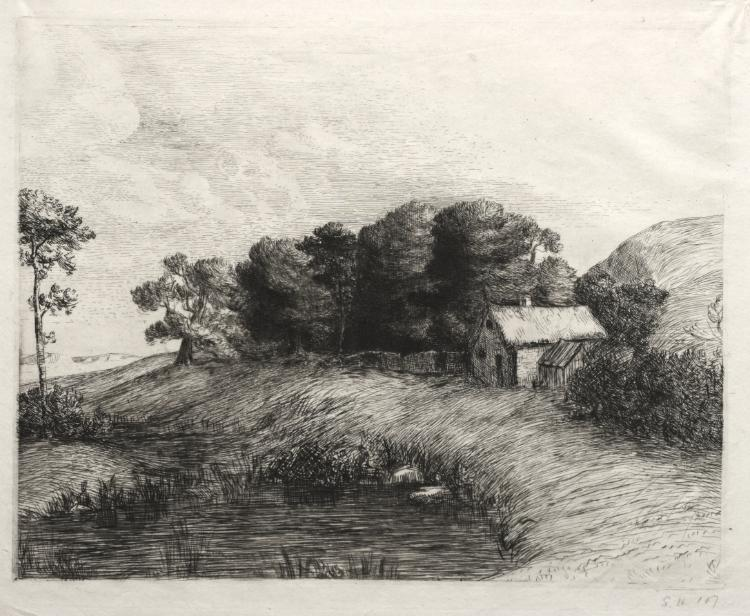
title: Landscape with a Pond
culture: France, 19th century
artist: Alphonse Legros (French, 1837–1911)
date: c. 1857–1911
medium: etching and drypoint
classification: Print